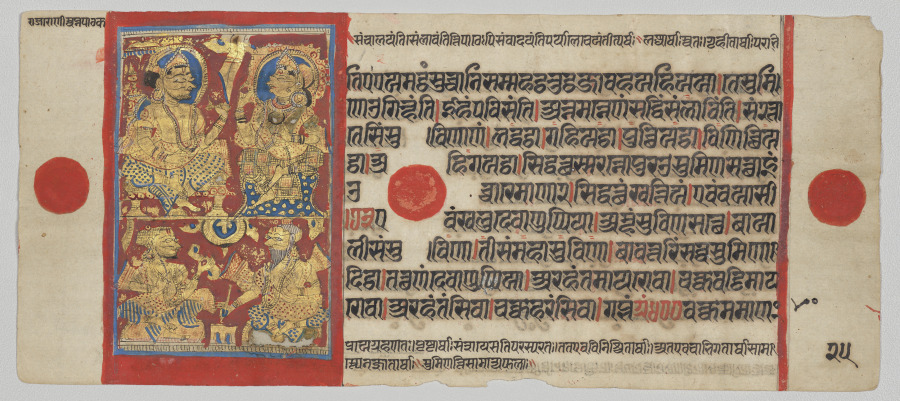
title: King Siddhartha and Queen Trishala with the Dream Interpreters, Folio 25 (verso), from a Kalpa-sutra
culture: Western India, Gujarat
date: c. 1475–1500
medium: Gum tempera, ink, and gold on paper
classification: Painting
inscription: [[upper left]] rājārāṇī svapnapāṭhaka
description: The king and queen seated in the upper register are the parents of Mahavira, founder of the Jain religion. The two bearded figures in the lower register are the learned men versed in the interpretation of dreams. One writes with a pen; the other consults a scroll. They predict that the auspicious dreams of the queen foretell the birth of a son who will either be a powerful hero and king or a religious leader of the world.